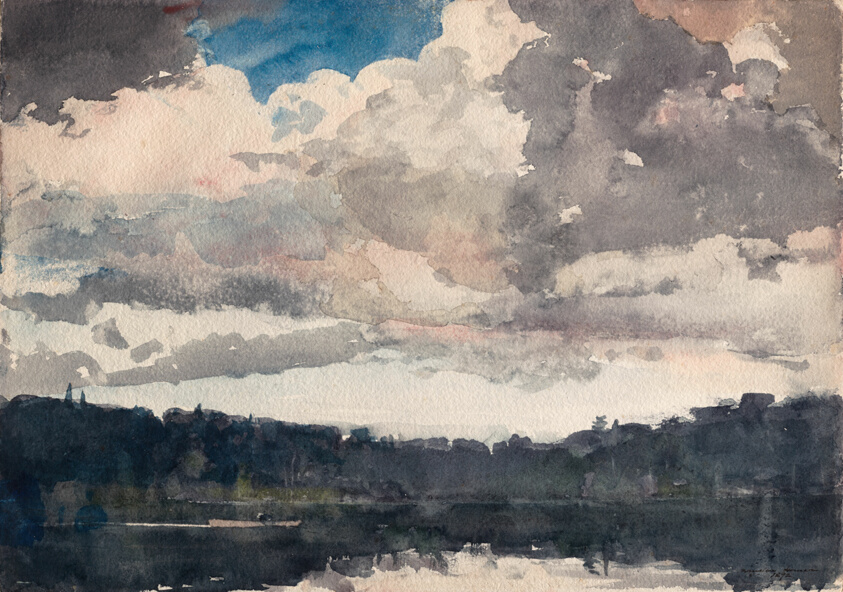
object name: Drawing and Watercolor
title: The Lone Boat, North Woods Club, Adirondacks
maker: Winslow Homer (American, 1836-1910)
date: 1892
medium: Watercolor, with rewetting, blotting, and scraping, over traces of graphite, on thick, rough-textured, ivory wove paper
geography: United States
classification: watercolor; drawings (visual works); prints and drawing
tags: Century of Progress, world's fairs, Chicago World's Fairs, wilderness